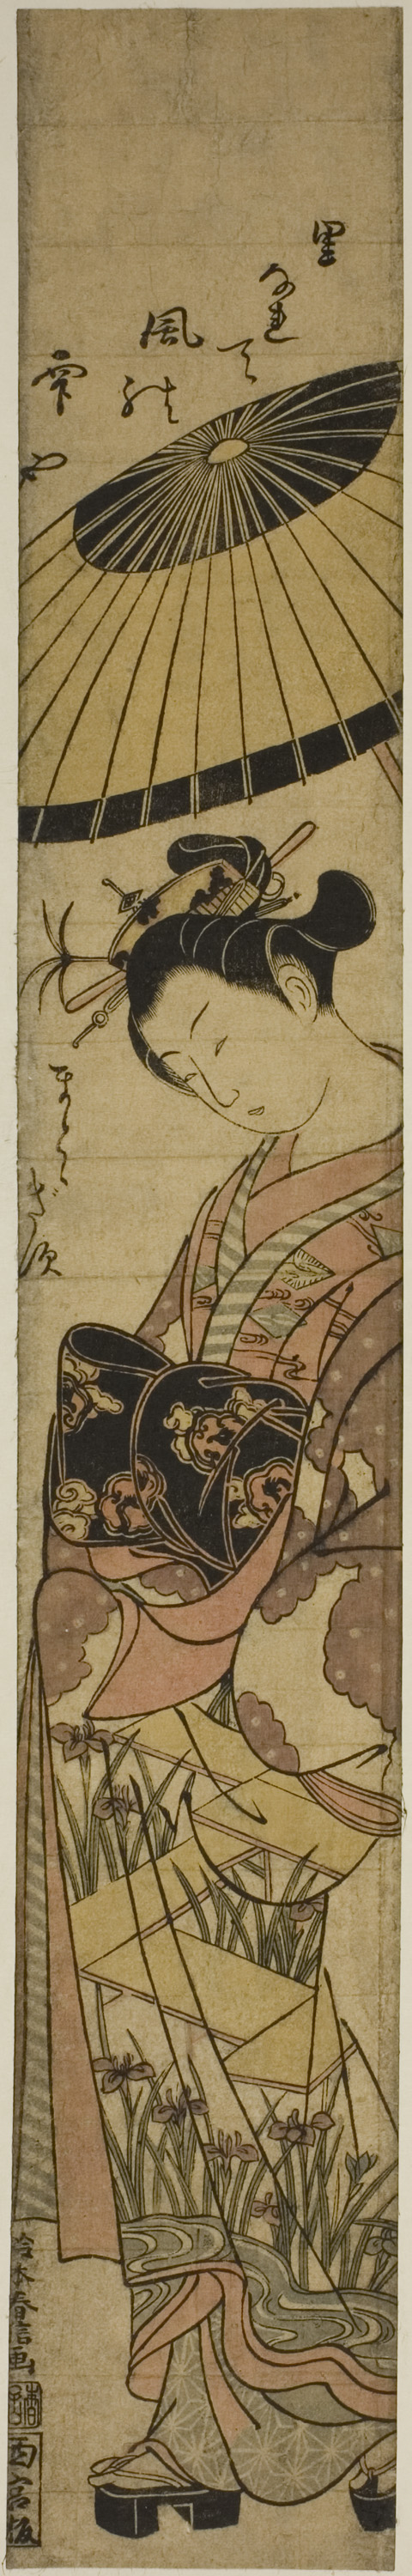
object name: Print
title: Courtesan on Parade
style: Japanese (culture or style)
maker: Suzuki Harunobu 鈴木 春信; Japanese, 1725 (?)-1770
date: c. 1763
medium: Color woodblock print; hashira-e, benizuri-e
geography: Japan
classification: woodblock print; print; asian art